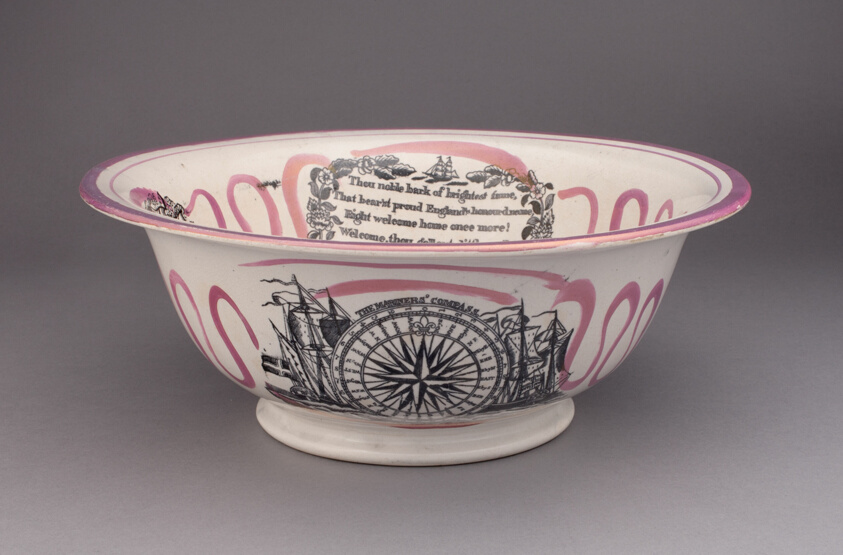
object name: Ceramics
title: Basin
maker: England, Staffordshire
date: 1820/50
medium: Lead-glazed earthenware with lustre decoration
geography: Staffordshire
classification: ceramics; european decorative arts